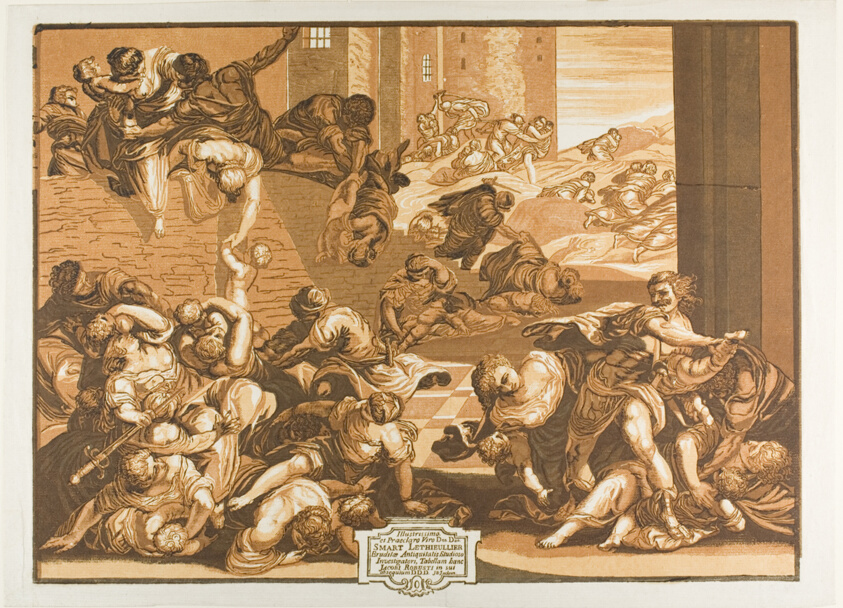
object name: Print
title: The Massacre of the Innocents, from Opera Selectiora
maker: John Baptist Jackson (English, 1701-1780); after Jacopo Robusti, called Tintoretto (Italian, 1519-1594)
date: 1739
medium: Chiaroscuro woodcut in buff, violet-gray, light brown and dark violet-brown on off-white laid paper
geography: Italy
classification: woodcut; print; prints and drawing